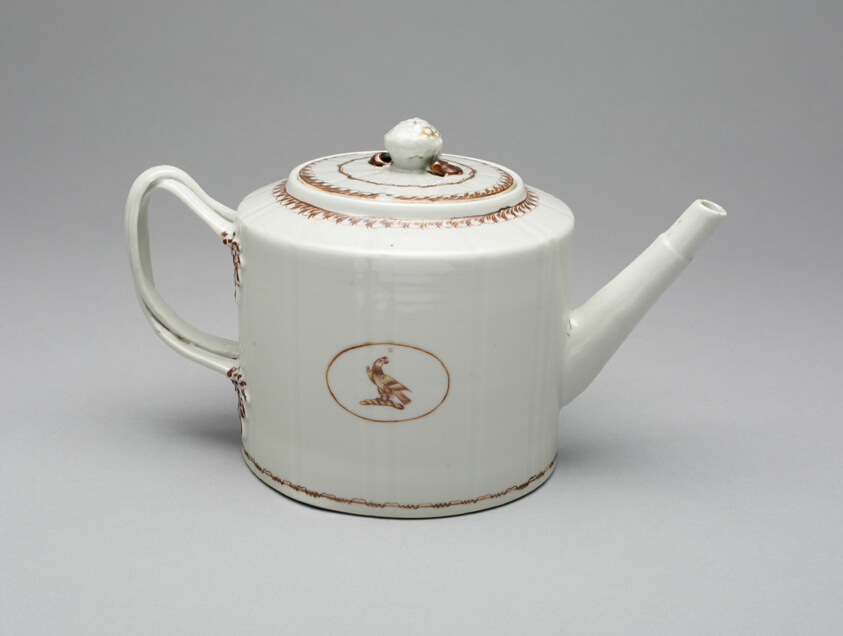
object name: Ceramics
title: Teapot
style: chinese export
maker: Artist unknown (Chinese, made for the American market); China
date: c. 1790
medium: Hard-paste porcelain, glaze, enamels and gilding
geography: China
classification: ceramics; chinese export porcelain; art of the americas; porcelain; decorative arts; American market; pottery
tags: eagle